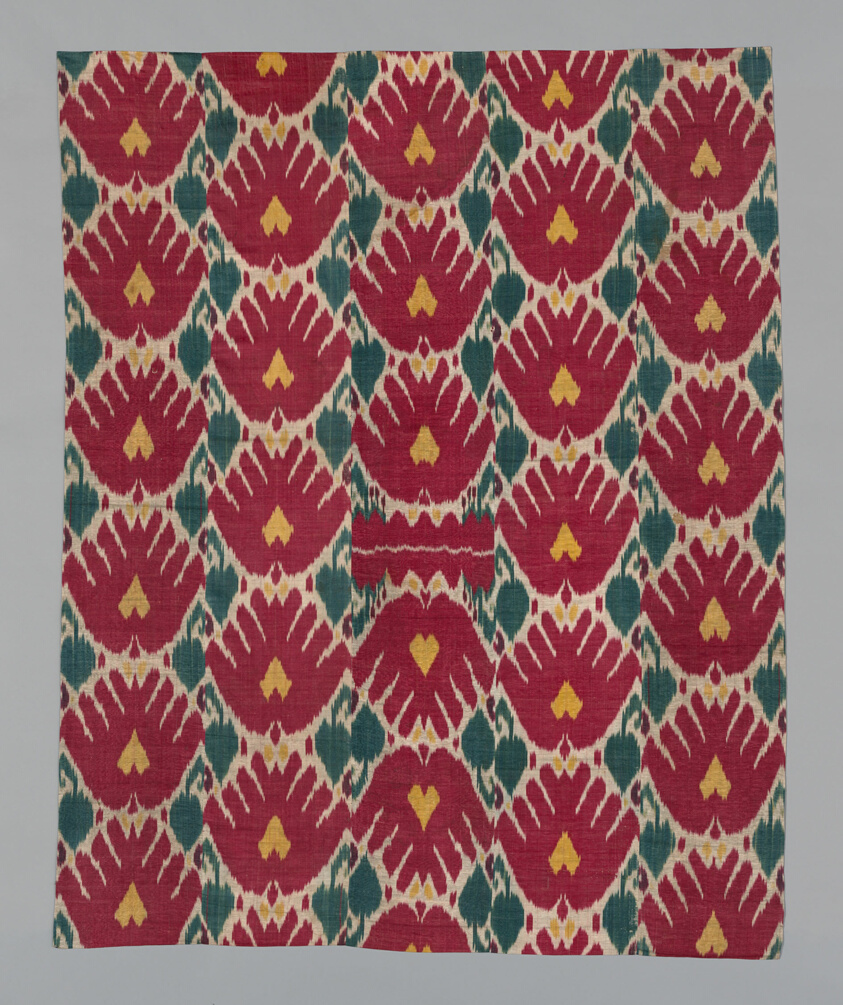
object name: Coverings and Hangings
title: Wall Hanging Composed of Five Panels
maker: Uzbekistan, Samarkand or Bukhara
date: 1850/75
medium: Silk, warp-faced plain weave; warp-dyed (ikat)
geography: Uzbekistan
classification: textile; weaving